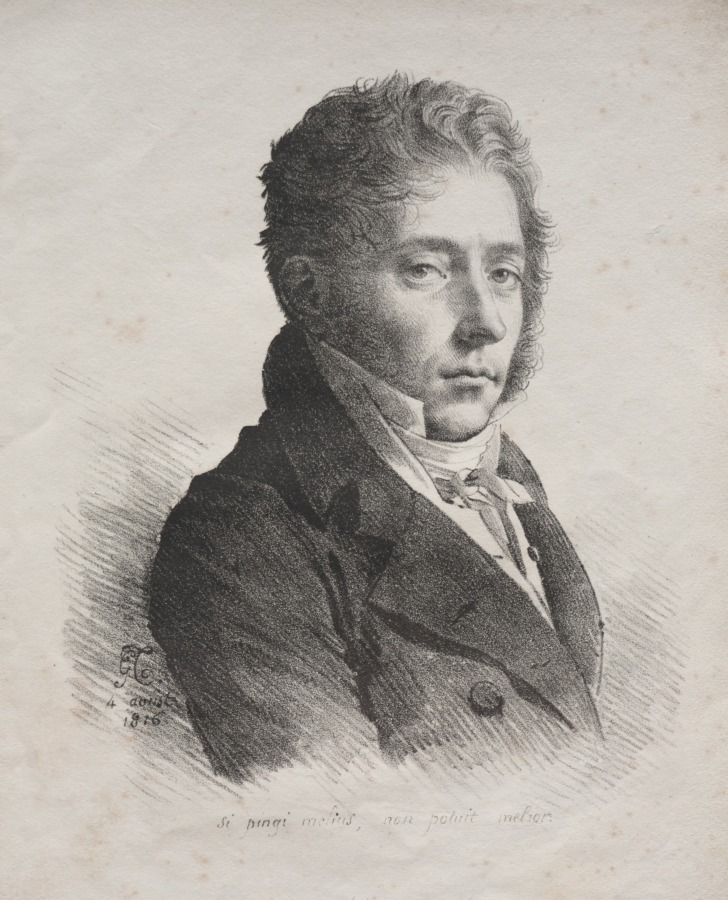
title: Recueil d'essais lithographiques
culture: France, 19th century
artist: Darmet (French)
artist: Anne-Louis Girodet de Roucy-Trioson (French, 1767–1824)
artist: Antoine Pierre Mongin (French, 1761–1827)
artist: Horace Vernet (French, 1789–1863)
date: 1816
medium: lithograph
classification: Bound Volume